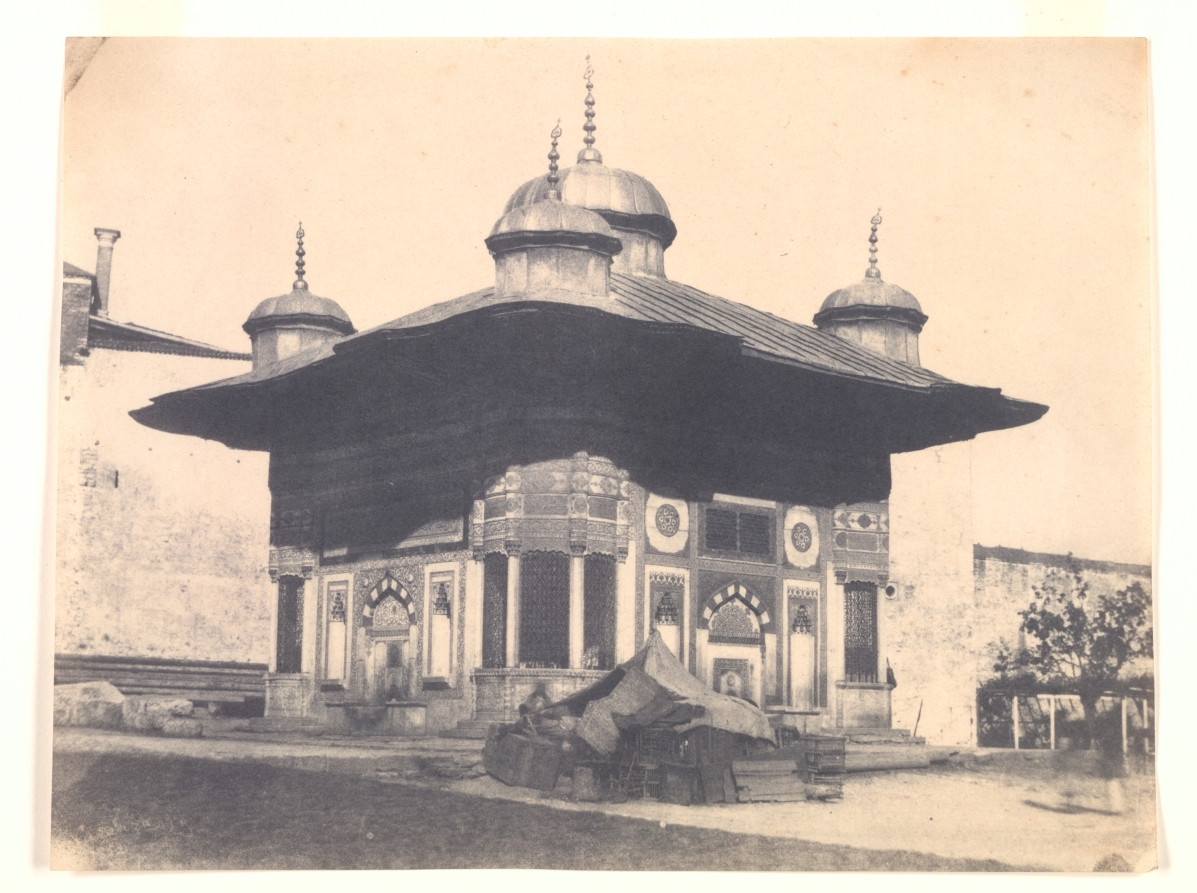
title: Fountaine de la Sophie, Constantinople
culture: France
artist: Ernest de Caranza (French, 1837–1863)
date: c. 1854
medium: salted paper print from paper negative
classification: Photograph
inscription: printed into the image on recto: "E. Caranza/ gallipoli juin / 1854" "24"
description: Arriving in Istanbul (then Constantinople) in 1852, Ernest de Caranza, a French factory engineer, took many photographs during his extensive travels on scientific missions throughout the Asiatic part of the Ottoman Empire. Self-taught as a photographer, he relied on the waxed paper negative process, created his own materials, and formulated an excellent fixative which tended to gray the blacks, giving the images a remarkable transparency in the shadows. In this charming view, he described the surrounding streetscape while concentrating on the distinctive, ancient architecture of the centrally positioned building. His beautifully descriptive photographs helped to shape Westerners' understanding of this historic city.